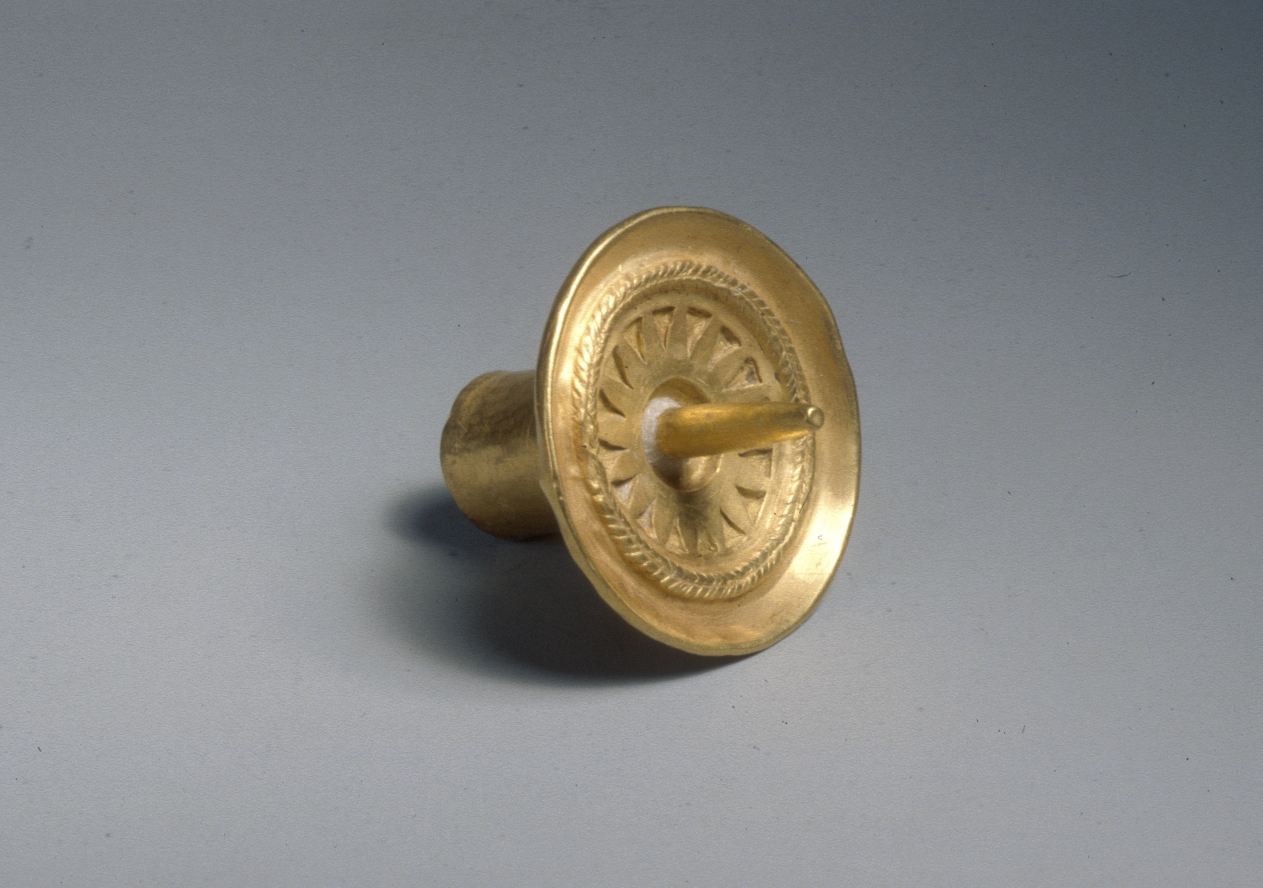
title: Ear Spool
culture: Panama, Conte style, 5th - 10th century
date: c. 400–900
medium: hammered gold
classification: Metalwork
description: Harvard archaeologists excavated these and seven other ornaments from several burials at Sitio Conte, a cemetery famous for its lavish graves of powerful chieftains. The young man buried in Grave 26 was such a chief. His status was stunningly memorialized by 21 human companions and 475 objects, many of them personal ornaments made of gold, including a large chest plaque and a rod-shaped ear ornament.